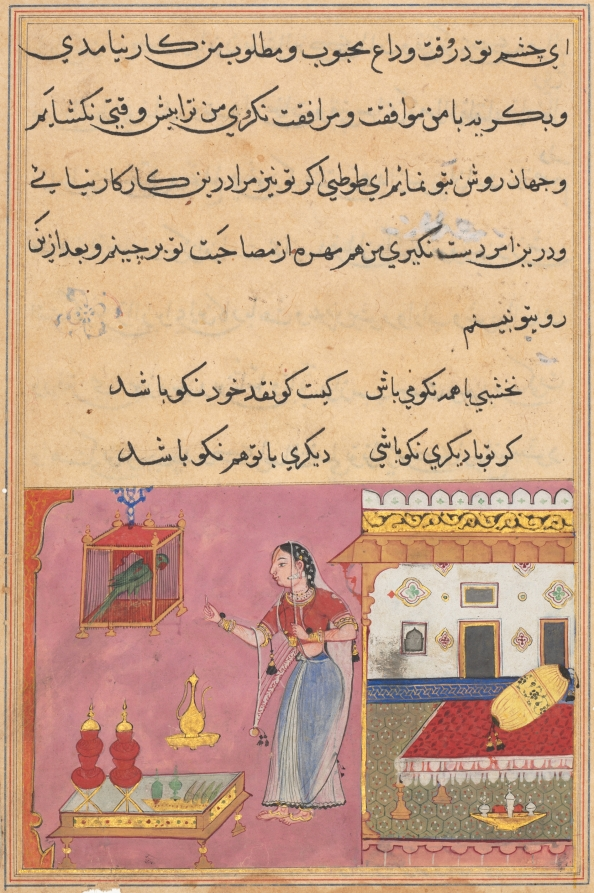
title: The Parrot Addresses Khujasta at the Beginning of the Twentieth Night, from a Tuti-nama (Tales of a Parrot)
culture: Mughal India, court of Akbar (reigned 1556–1605)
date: c. 1560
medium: gum tempera, ink, and gold on paper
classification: Painting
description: Tuti the parrot begins telling Khujasta a story about the daughter of a pious man who turned down three suitors, so she could follow religious pursuits. She stands outside her bed chamber, where a low table has stacked red water jugs, and a dish with ingredients to make paan. The golden ewer and basin are for handwashing.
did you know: Khujasta is wearing an ivory-peg earring.